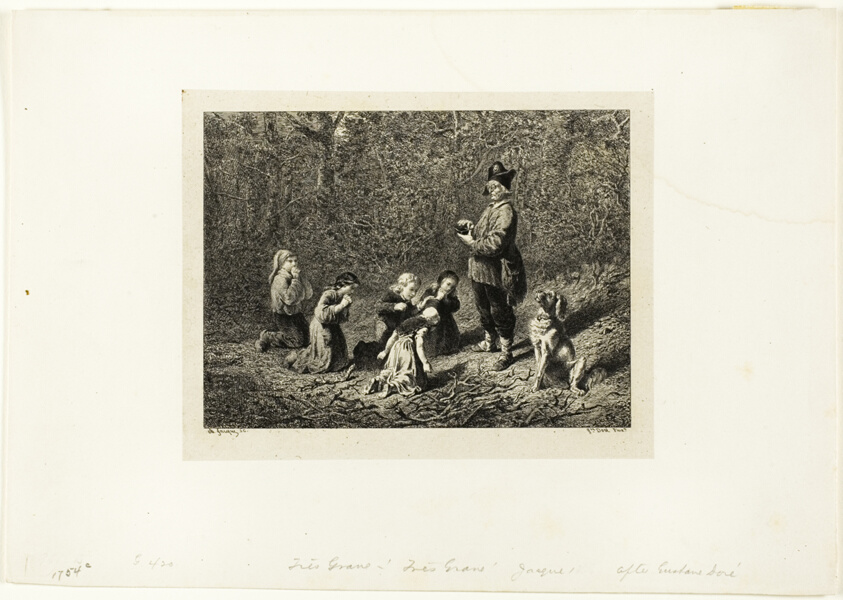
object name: Print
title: Grave! Grave! Très-Grave!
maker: Charles Émile Jacque (French, 1813-1894); after Gustave Doré (French, 1832-1883)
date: 1862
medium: Etching, engraving, drypoint and roulette on light gray China paper laid down on ivory wove paper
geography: France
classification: etching; print; prints and drawing